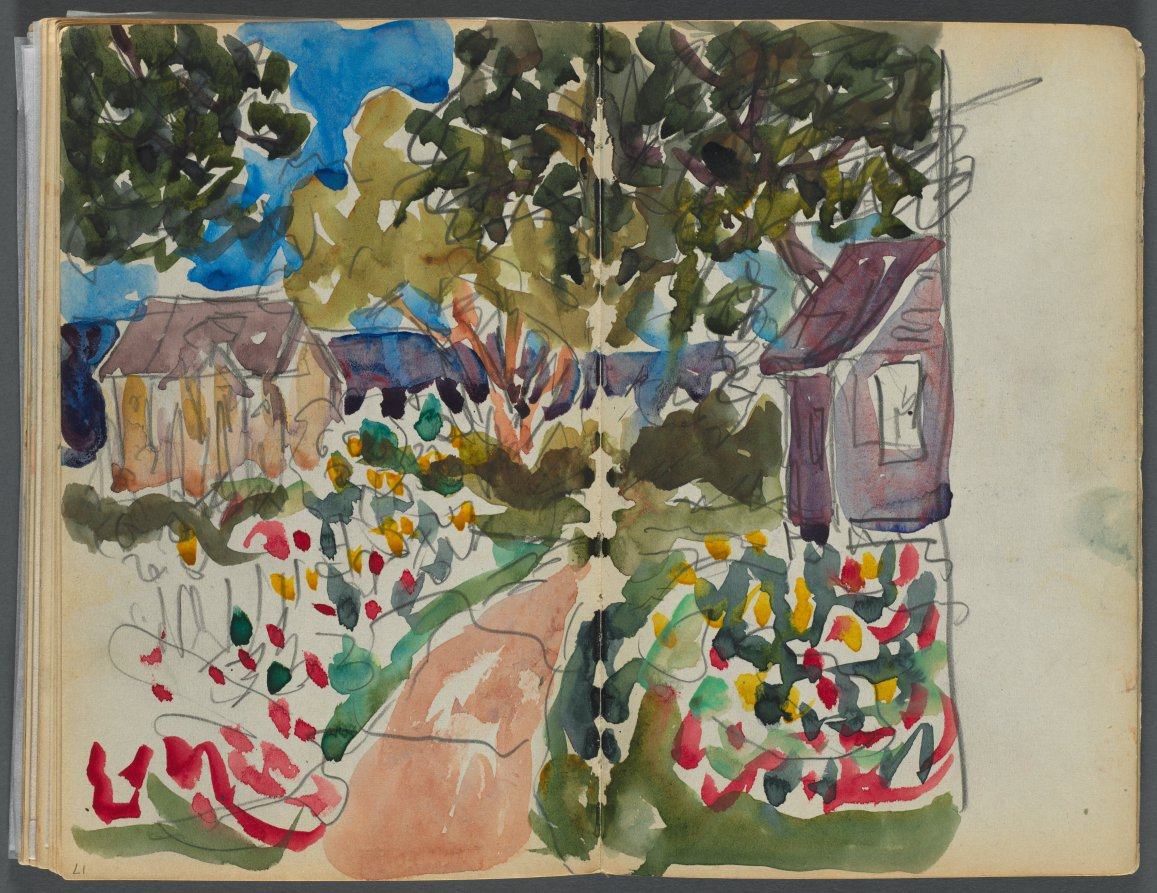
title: Sketchbook- The Granite Shore Hotel, Rockport, page 016 &17: Houses and Gardens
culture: America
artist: Maurice Prendergast (American, born Newfoundland [now Canada], 1858–1924)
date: c. 1916/19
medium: graphite and watercolor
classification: Bound Volume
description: This sketchbook contains 72 pages of pencil drawings and 9 watercolors of Cape Ann. On the inside of the cover Prendergast wrote the address of the Granite Shore Hotel in Rockport, Massachusetts.